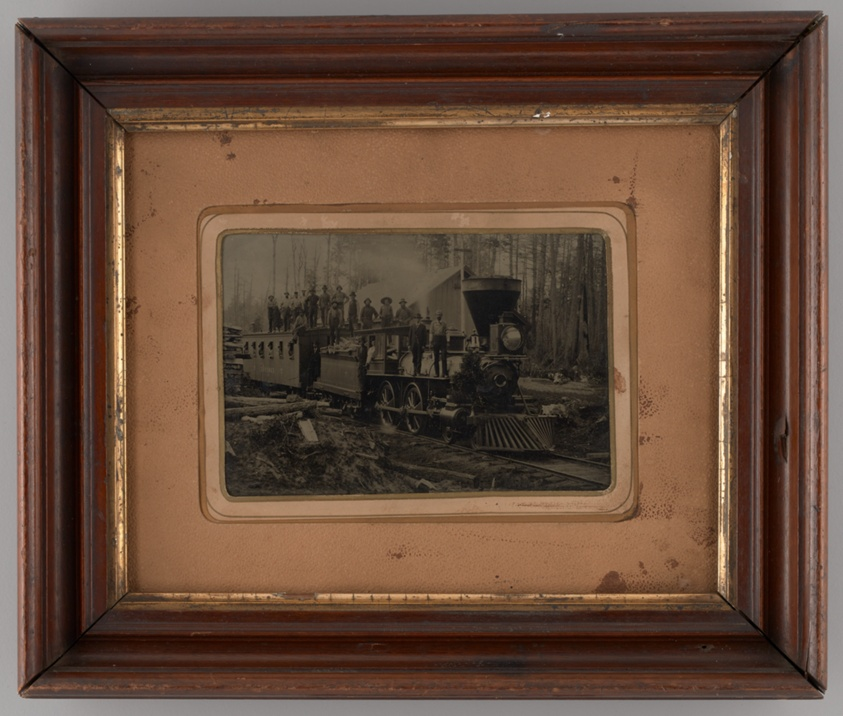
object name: Photograph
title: Untitled (Ashton Station, Michigan)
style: 19th century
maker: Unknown maker; American, 19th century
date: 1877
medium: Tintype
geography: United States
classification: photography; tintype; photograph; photographic process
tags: lundberg collection, people, train station, trains